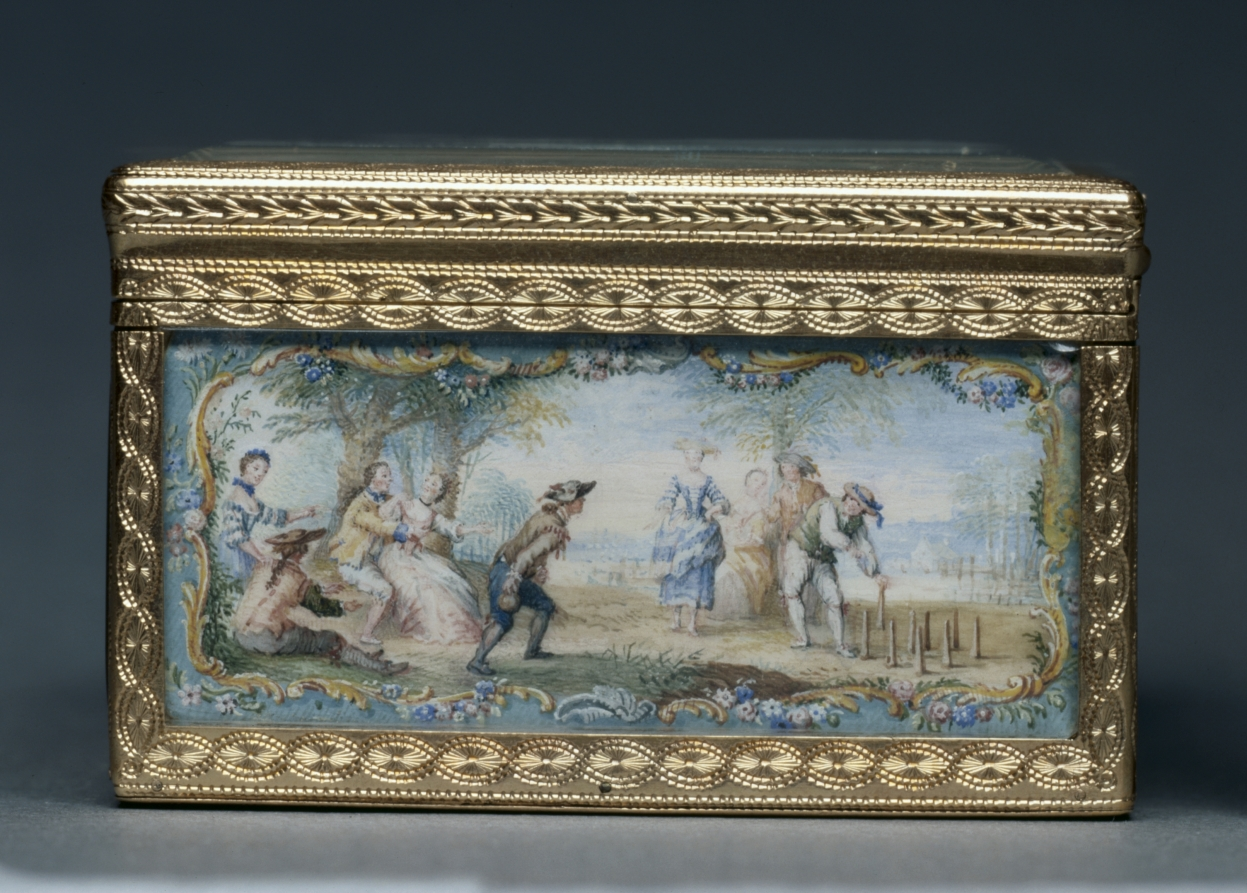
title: Snuff Box (Tabatière)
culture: France, 18th century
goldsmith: Jean Ducrollay (French, 1709–1787)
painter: Louis Nicolas van Blarenberghe (French, 1716–1794)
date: 1753–54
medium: gold and glass with miniatures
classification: Metalwork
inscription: [Maker's mark of Jean Ducrollay, master goldsmith in 1734, inside cover; bottom; right side]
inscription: [Charge mark of Julien Berthe, Paris, 1750-1756, inside cover; bottom; right side]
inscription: [Discharge mark of Julien Berthe, Paris, 1750-1756, on bezel]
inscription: [Inscribed on miniature, front side]: "V.[an] Blarenberghe/1753"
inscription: [Warden's mark for Paris, 1763-1754, inside cover; bottom; right side]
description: In 18th-century France ornately enameled boxes that held snuff—powdered tobacco—became a popular accessory in the French court. This object’s rectangular shape differs from early work attributed to Jean Ducrollay. Though the light colors, floral borders, and depictions of lively outdoor recreation are representative of earlier rococo imagery, the rectangular shape and simple frieze make it a primary example of rising neoclassicism.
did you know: The Ducrollay family was one of the most sought-after Parisian goldsmith workshops under the reign of French King Louis XV.